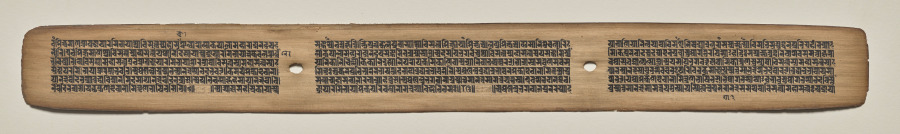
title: Text, Folio 146 (recto), from a Manuscript of the Perfection of Wisdom in Eight Thousand Lines (Ashtasahasrika Prajnaparamita-sutra)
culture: Eastern India, Bihar, Vikramashila Monastery. Painting: Nepal, Kathmandu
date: Sunday, September 14, 1119 (year 239 of the Newar Samvat in the month of Ashvina)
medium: gum tempera and ink on palm leaves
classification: Painting